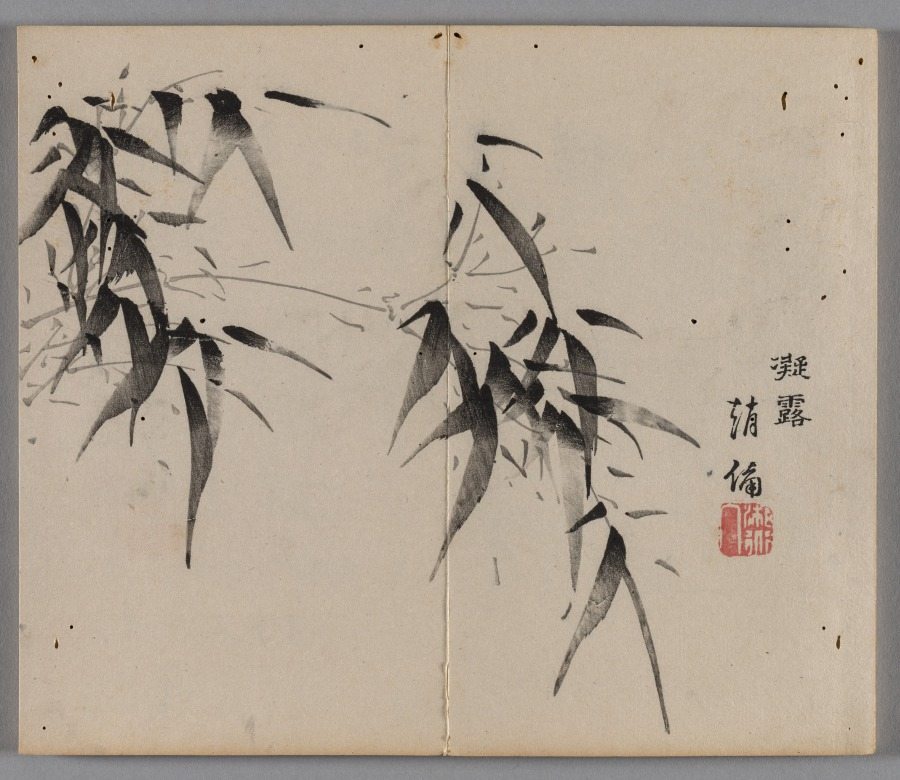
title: Ten Bamboo Studio Painting and Calligraphy Handbook (Shizhuzhai shuhua pu): Bamboo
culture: China, Qing dynasty (1644-1911)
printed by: Hu Zhengyan (Chinese, c. 1584–1674)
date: 1633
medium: Woodblock-printed book; ink and colors on paper; first edition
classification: Print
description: Color printing reached a level of perfection in the early 1600s, as seen in this Ten Bamboo Studio Collection of Calligraphy and Painting and the Mustard Seed Garden Manual of Painting (printed 1679 and 1701). The painterly quality, precision in registering (aligning) the woodblocks, and harmonious colors made them the most successful color print editions in Chinese history. Both editions were printed and compiled in Nanjing, spread nationwide, and had a great impact on the arts in Japan and Korea.